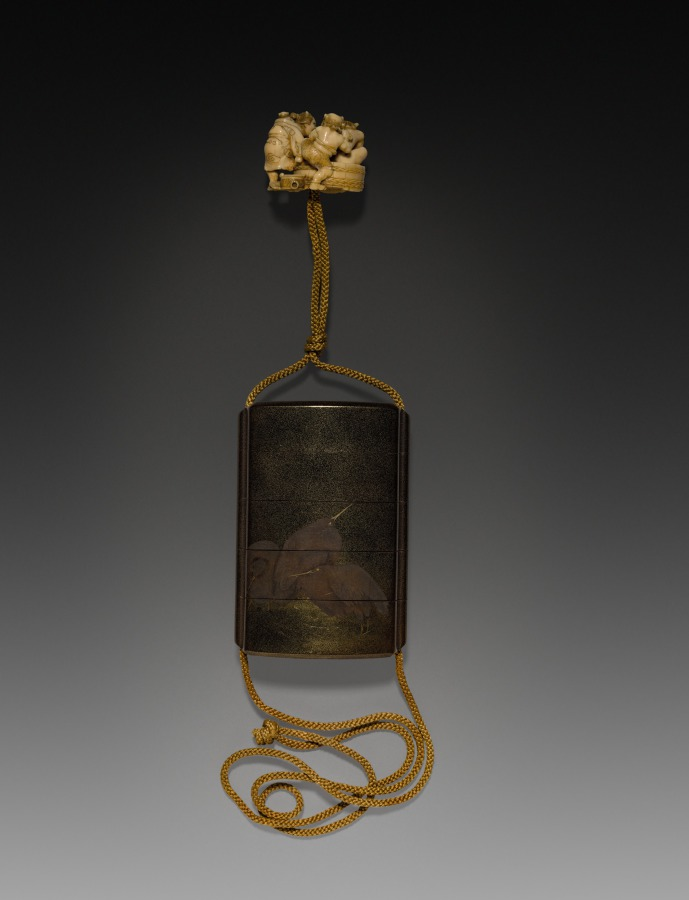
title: Netsuke with Demon Bathing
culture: Japan, Meiji period (1868–1912)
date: c. 1890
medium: ivory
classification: Netsuke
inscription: Signed: 玉秀